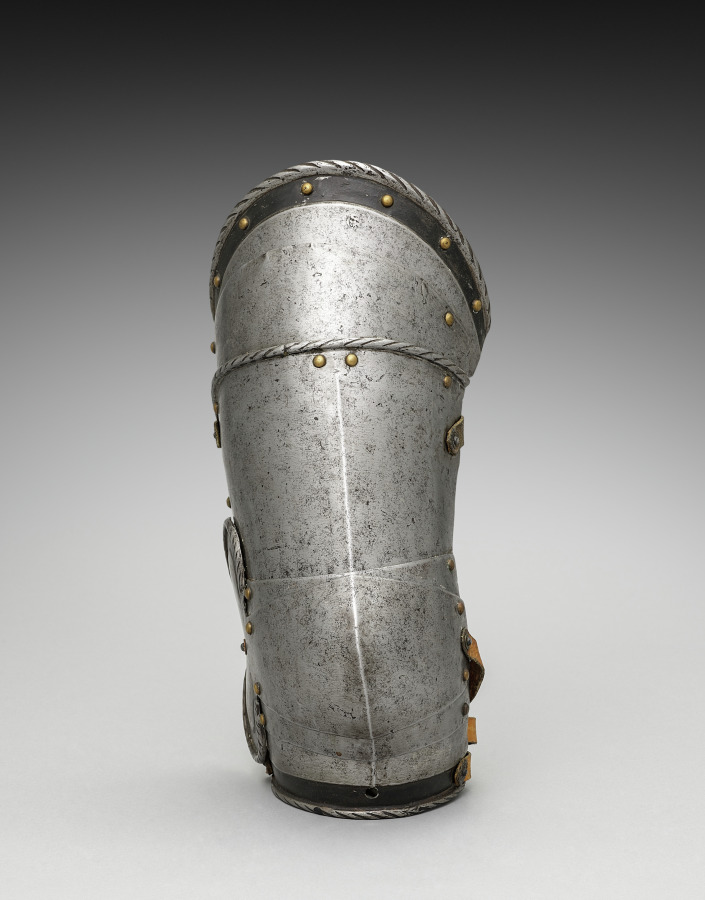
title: Right Cuisse with Poleyns (knee-cops)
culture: Germany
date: c.1550–1570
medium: iron, steel, leather and brass rivets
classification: Arms and Armor